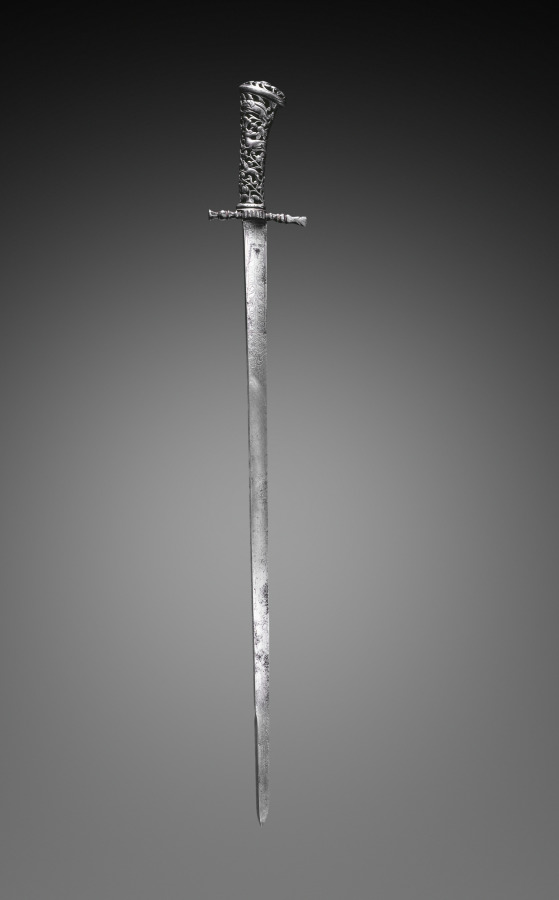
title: Hunting Sword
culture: Netherlands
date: c. 1760–70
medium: steel; pierced and chiseled cast-iron hilt ; blade engraved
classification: Arms and Armor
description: No gentleman's hunting costume was complete without a hunting sword. These special sidearms, designed primarily as defense against dangerous game in the field, were also used to dispatch game at the end of a chase. It was a point of honor among aristocratic hunters to carve and section the game in the field, a further function for which these swords were well suited. They were often made as a set, or garniture, and included smaller knives, forks, and other implements for carving the carcass.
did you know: Besides being viewed as a recreation for European nobility and an ancient and hereditary right, hunting was recognized as a necessary and pragmatic skill which supplied an additional source of food and dispatched animals which were considered a menace.